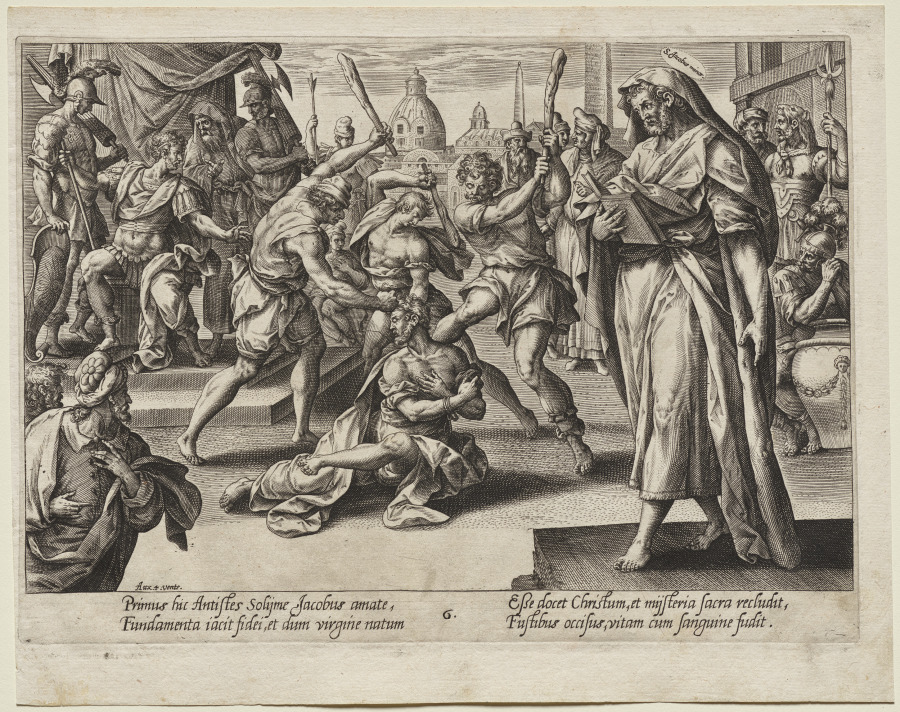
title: St. James the Less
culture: Netherlands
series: Christ, St. Paul, and the Twelve Apostles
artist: Hendrick Goltzius (Dutch, 1558–1617)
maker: after Maarten de Vos (Flemish, 1532–1603)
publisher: Aux Quatre Vents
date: c. 1578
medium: engraving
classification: Print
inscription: Aux.4.vents. bottom right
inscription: Verses in lower margin: Primus hic…sanguine fudit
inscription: Above head: S Jacobus minor. Numbered 6.